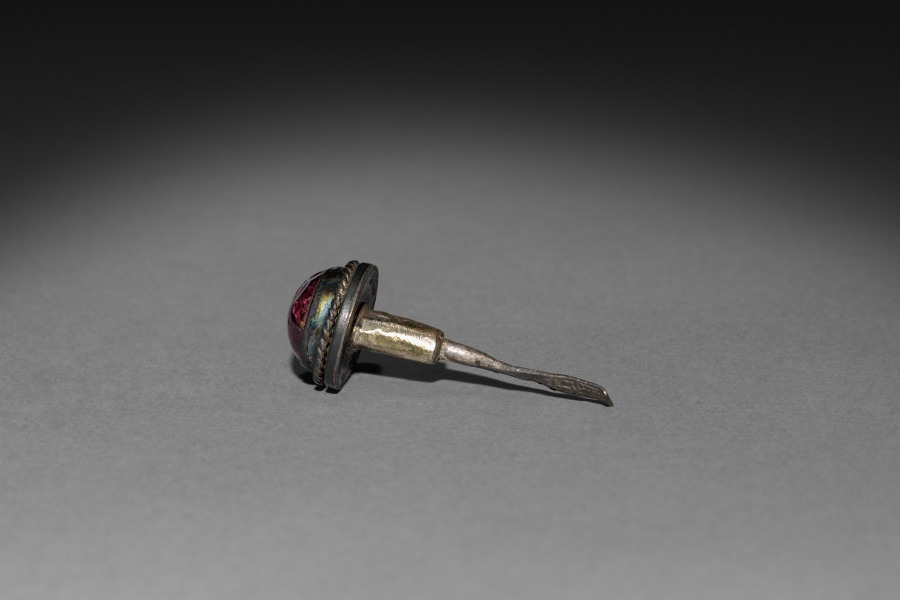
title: Snuff Bottle (stopper)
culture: China, Qing dynasty (1644-1911)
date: 1644–1911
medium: glass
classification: Glass